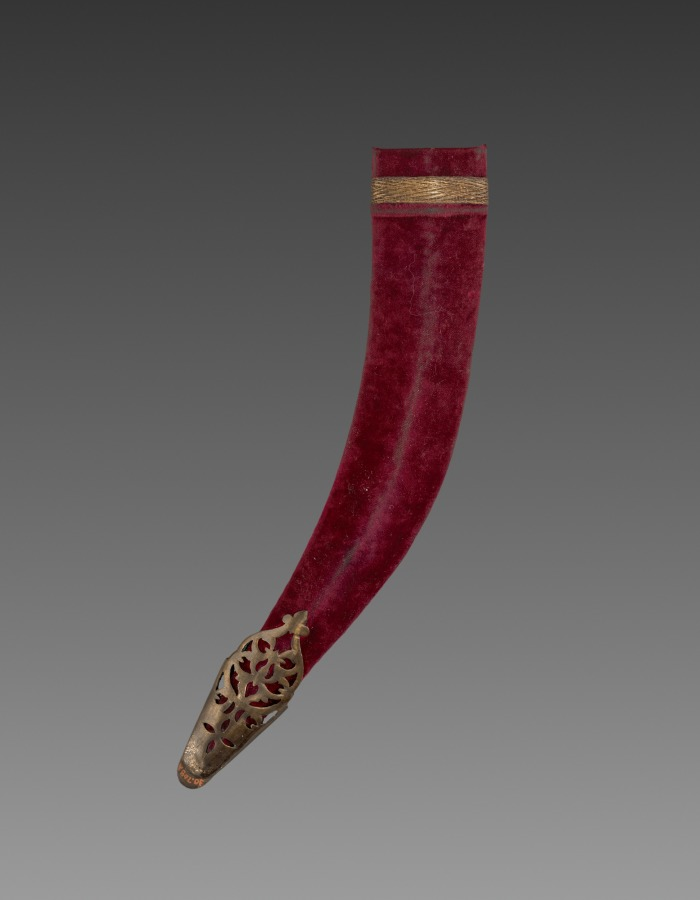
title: Dagger (red velvet case)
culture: India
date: 1700s–1800s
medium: Wood sheath covered in velvet with metallic thread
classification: Arms and Armor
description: Daggers with curved blades, known as khanjar, were worn tucked into the belt as one of the basic accessories for Mughal men. An all-purpose knife that could be used in hunting or fighting, the khanjar was also a visible status symbol. The use of jade and gold indicates that this dagger was owned by a member of the court. The gold inscriptions on the blade, just under the hilt, are quotations from the Qur’an, the most sacred book for Muslims. On one side is the opening line: “In the Name of God the Merciful and the Compassionate,” and on the other is a popular verse from chapter (sura) 61: “Help comes from God, and Victory is imminent.”